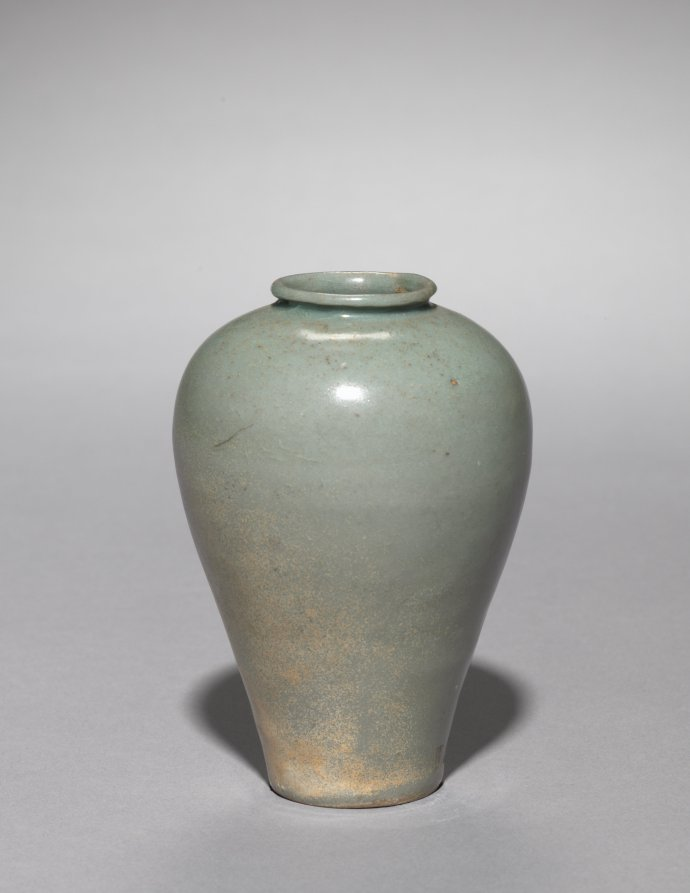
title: Miniature Jar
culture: Korea, Goryeo dynasty (918–1392)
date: 1100s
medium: celadon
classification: Ceramic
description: Celadons, spoons, seals, and bronze mirrors were the most common burial objects in tombs during the Goryeo period (918-1392). Furnishing tombs with an elaborate assemblage of objects was believed to honor and comfort the newly dead. This miniature jar was not used during the lifetime of the tomb owner, but rather was specially commissioned as part of the burial goods.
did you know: This miniature celadon jar was part of the gifts donated by John L. Severance (1863–1936). He and his father Louis H. Severance (1838–1913) collected Korean ceramics of the Goryeo dynasty (918–1392) from a number of pioneering medical missionaries as a way to foster their activities in Korea, and later donated them to the Cleveland Museum of Art.